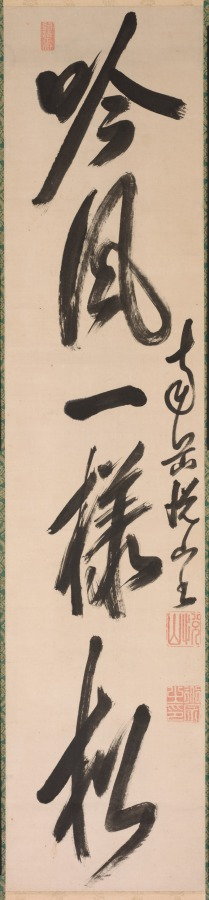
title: Calligraphy in Semi-Cursive Style (xing-caoshu)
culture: China, Qing dynasty (1644-1911)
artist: Yueshan Daozong (Chinese, 1629–1709)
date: c. 1660–1709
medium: hanging scroll; ink on paper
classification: Calligraphy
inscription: 吟風一樣松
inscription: 悅山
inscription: 道宗之印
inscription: Linji zheng zong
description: This bold calligraphy written by Yueshan, an Ōbaku school monk, consists of five characters tentatively translated as “Pine trees singing in the wind.” The line is from Cold Mountain Poems (Hanshan shi). Cold Mountain is the pen name (hao) of the poet monk Han Shan, as well as the name of a place. In one poem Han describes getting lost on the road to Cold Mountain, perhaps an allusion to the search for religious enlightenment.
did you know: The Ōbaku school of Chan (Zen in Japanese) Buddhism was founded in Japan by Chinese monks in the 1600s. The monk Yueshan emigrated from the Chinese province of Fujian to serve as priest and later abbot at Manpukuji, the headquarters of the Ōbaku school in Japan.